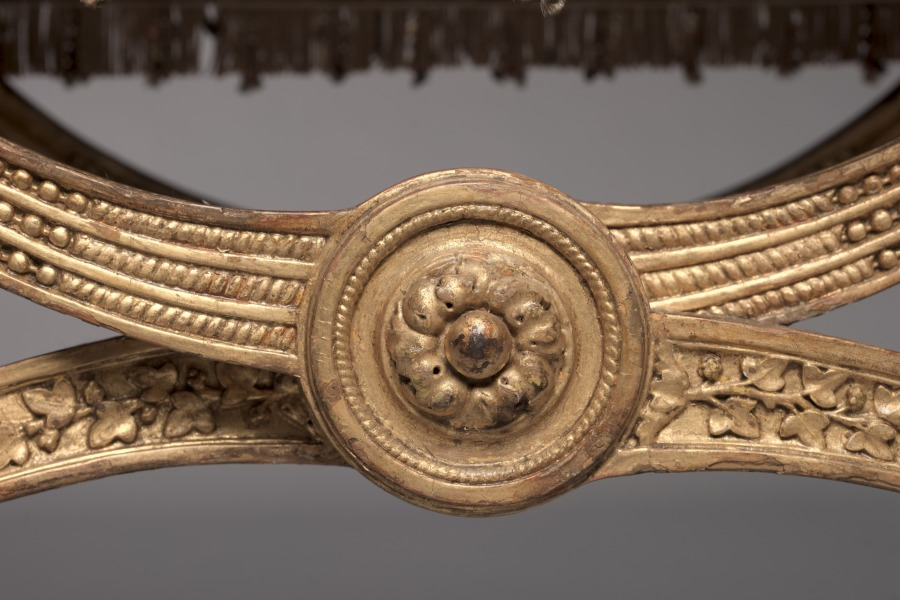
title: Stool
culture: France, 18th century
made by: Jean-Baptiste-Claude Sené (French, 1748–1803)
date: 1786–1787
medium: carved and gilded wood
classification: Furniture and woodwork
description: These stools were made for the gaming room of Marie-Antoinette at the Chateau de Compiègne and later placed in the Chateau de Fontainbleau.